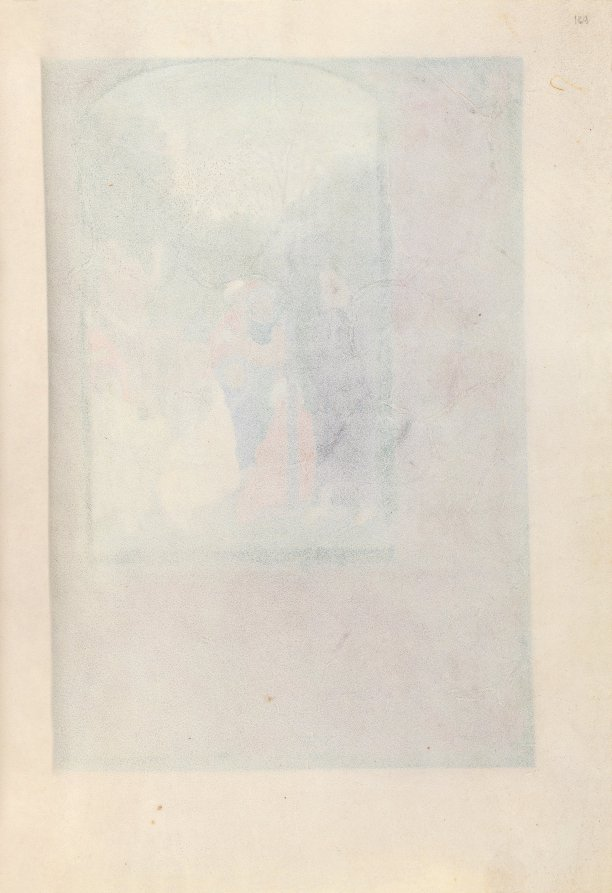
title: Hours of Queen Isabella the Catholic, Queen of Spain: Fol. 169r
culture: Flanders, Ghent and Bruges, late 15th century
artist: Master of the First Prayerbook of Maximillian (Flemish, c. 1444–1519)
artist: and Associates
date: c. 1500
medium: ink, tempera, and gold on vellum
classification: Bound Volume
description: This manuscript was illuminated by a circle of at least five highly organized manuscript painters active in the Flemish cities of Ghent and Bruges. The principal illuminator was Alexander Bening, who painted the majority of the book's miniatures. Manuscripts produced by this circle of artists are renowned for the decoration of their borders, which typically feature a rich variety of realistically-painted flowers, birds, and butterflies. This prayer book, called a book of hours, was intended not for a cleric, but for the private devotions of a lay person-in this case, Isabella the Catholic, Queen of Spain (1451-1504). Isabella's coat of arms embellishes the book's frontispiece. It is unlikely that the book was commissioned by the Queen herself; rather, she probably received it as a diplomatic gift from someone courting her patronage, perhaps Cardinal Francisco Jimenez de Cisneros. A Franciscan friar, Jimenez was dependent upon Isabella for his advancement, first to the post of Queen's confessor in 1492, and then to Archbishop of Toledo in 1495.